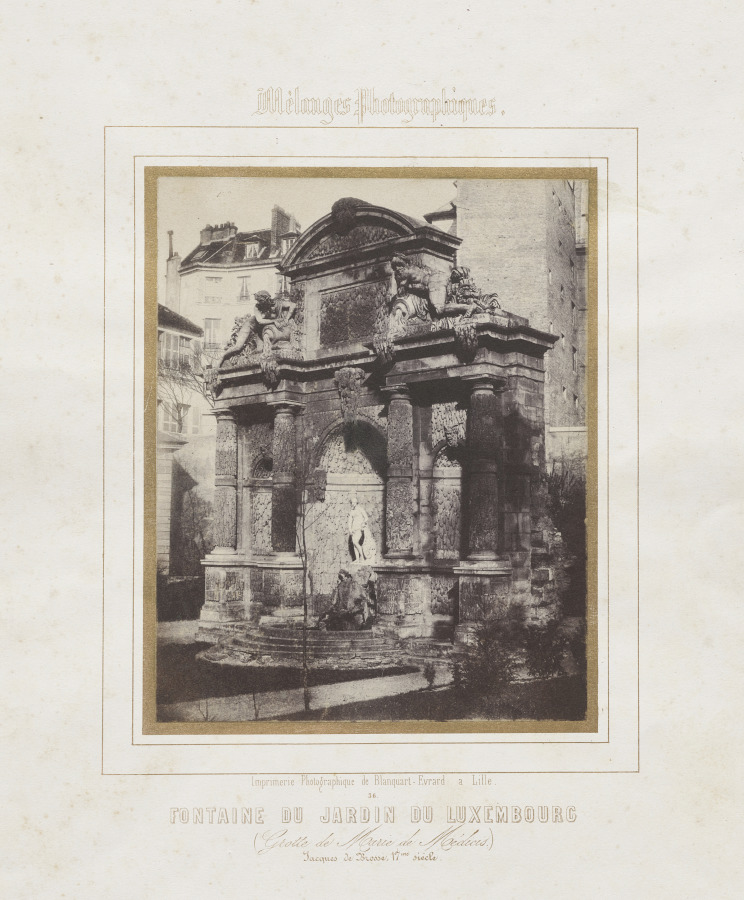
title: Fontaine du Jardin du Luxembourg (grotte de Marie de Médécis)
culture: France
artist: Charles Marville (French, 1813–1879)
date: c. 1850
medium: Salted paper print, Blanquart-Évrard process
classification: Photograph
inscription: Imprinted on recto: "Melanges Photographiques"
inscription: Imprinted on recto: "Imprimerie Photographique de Blanquart-Evrard a Lille"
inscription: Imprinted on recto: "36/Fontaine du Jardin du Luxembourg/(Grotte de Marie de Médicis)/Jacques de Brosse, 17em siecle"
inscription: Written in pencil on verso: "30/14"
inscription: Written in pencil on verso: "20.1 x 16/53.5x 34.5"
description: This fountain was part of those gardens. Charles Marville, who specialized in photographing landscapes, architecture, and urban views, made this photograph four decades after the fountain’s 1811 restoration, which added the white marble statue of Venus bathing. If you go to Paris now, you will see the 1864 restoration, which radically restructured it and moved it 100 feet to make way for a street.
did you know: In the 1620s, French queen Marie de’ Medici built an Italianate palace and gardens on Paris’s Left Bank.